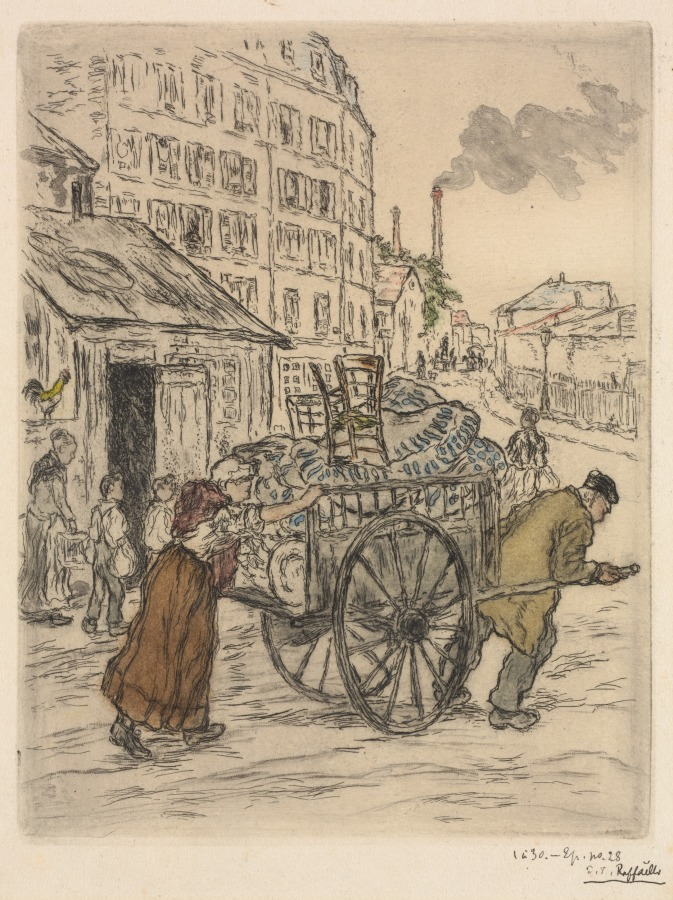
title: Le Déménagement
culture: France, 19th century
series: Types de petits Gens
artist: Jean-François Raffaëlli (French, 1850–1924)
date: 1894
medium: etching and roulette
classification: Print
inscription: lower margin, in pen and black ink: 1 à 30.-Ep. No. 28 / J. F. Raffaëlli